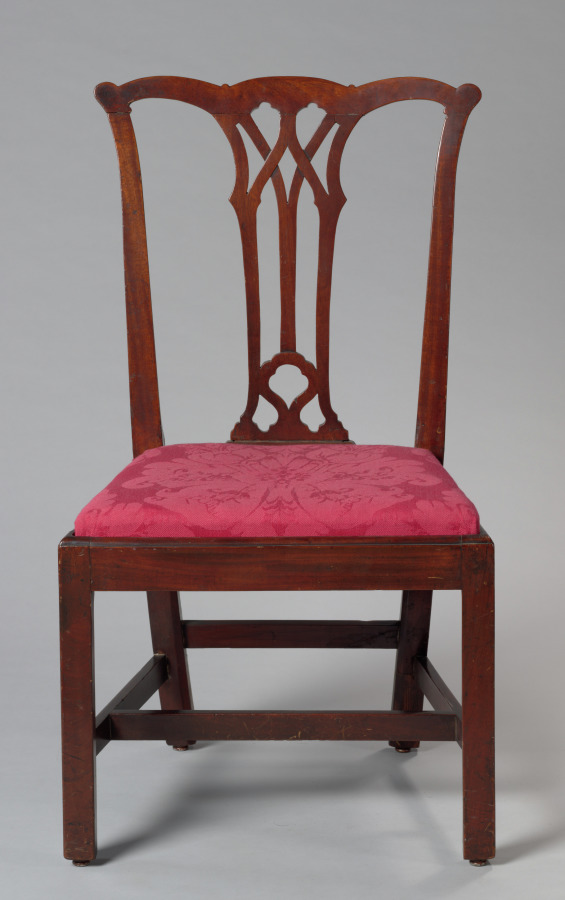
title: Side Chair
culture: America, Pennsylvania, Philadelphia, Chippendale style, 18th century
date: c. 1780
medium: wood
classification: Furniture and woodwork